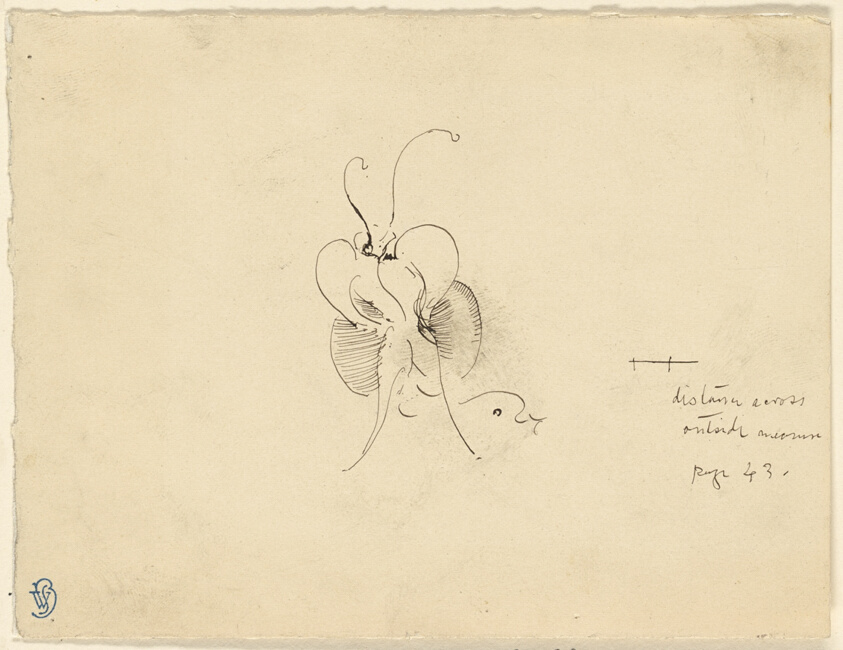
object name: Drawing and Watercolor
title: Butterfly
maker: James McNeill Whistler (American, 1834-1903)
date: 1898/99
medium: Pen and black ink on cream wove card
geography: United States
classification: pen and ink drawings; drawings (visual works); prints and drawing; paper